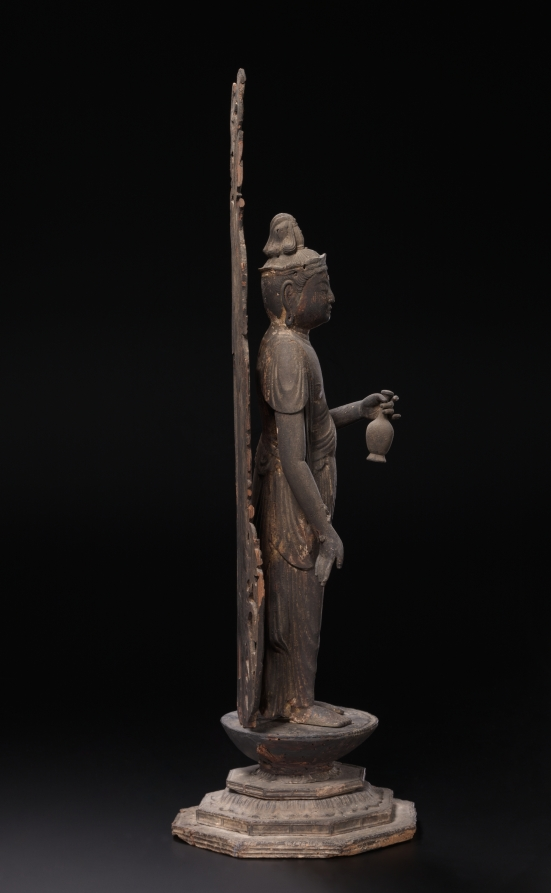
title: Miroku: Future Buddha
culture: Japan, Heian period (794–1185)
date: 1100s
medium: wood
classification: Sculpture